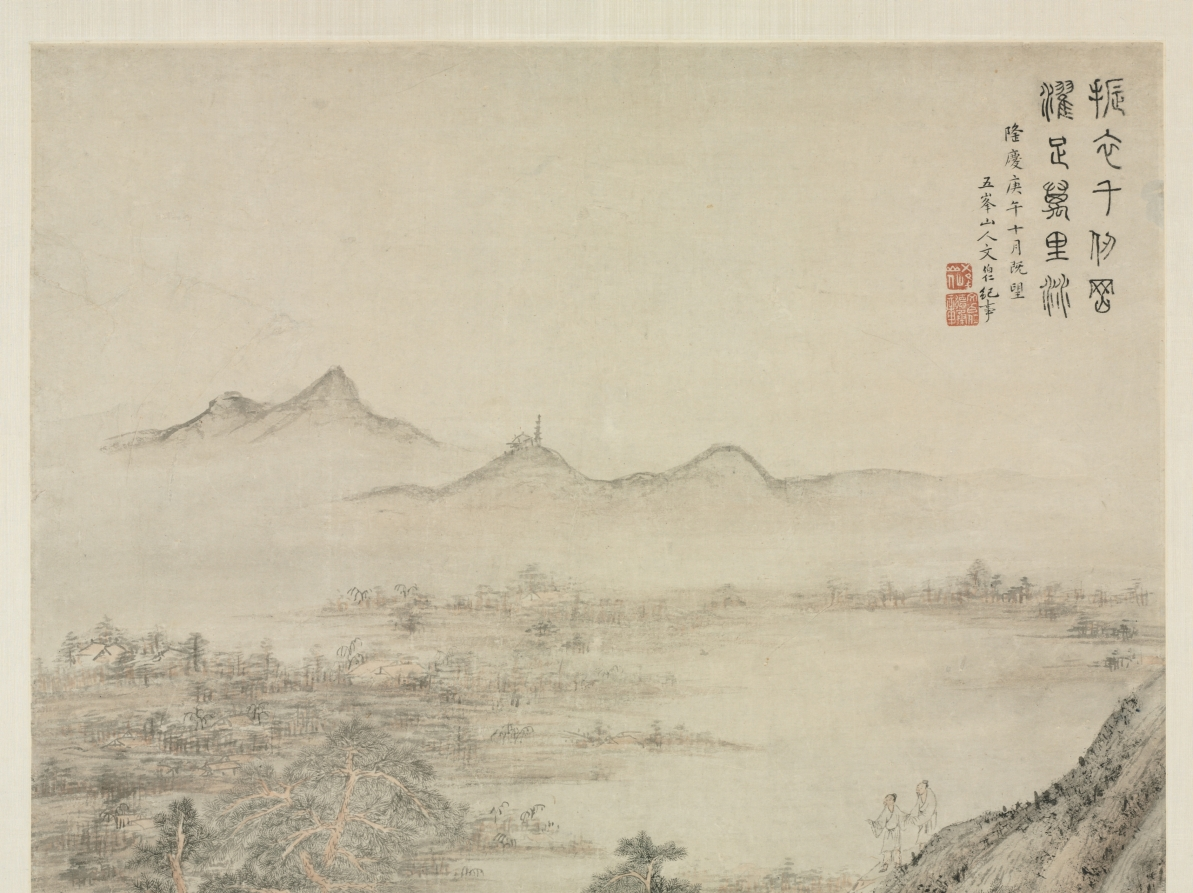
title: Washing the Feet (from the Dusty World)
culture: China, Ming dynasty (1368–1644)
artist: Wen Boren (Chinese, 1502–1575)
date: 1570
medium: Hanging scroll mounted on a panel; ink and color on paper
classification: Painting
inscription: Artist's inscription, signature, and 4 seals: Shaking one's clothes on a thousand-jen peak,/ Washing one's feet in a ten-thousand-li stream. In the gengwu year of the Longqing era [1570], fifteenth day of the tenth month, Wufeng shanren, Wen Boren recorded a special occasion. [2 seals] Wufeng shanren; Wen Boren Te-ch'eng chang. [2 seals, lower right corner] Te-ch'eng; She-shan chang. trans. HR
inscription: 2 additional seals of Zhang Heng 張珩 (1915-1963)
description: A scholar on a boat in the middle ground bathes his feet in the cooling stream. The vast river scene is depicted from a high viewing point. The motif of a scholar washing his feet illustrates the phrase, “When the waters of the Canglang are clear, I wash my capstrings. When the waters of the Canglang are muddy, I wash my feet [only]” (from Songs of Chu, written before 256 BC). The passage evokes the image of the virtuous scholar-official who avoids government service when the ruler is corrupt (the rivers are muddy) and resumes service (washing my capstrings) when the waters are clear. Whether the artist here alludes to unfavorable times of government is not clear.